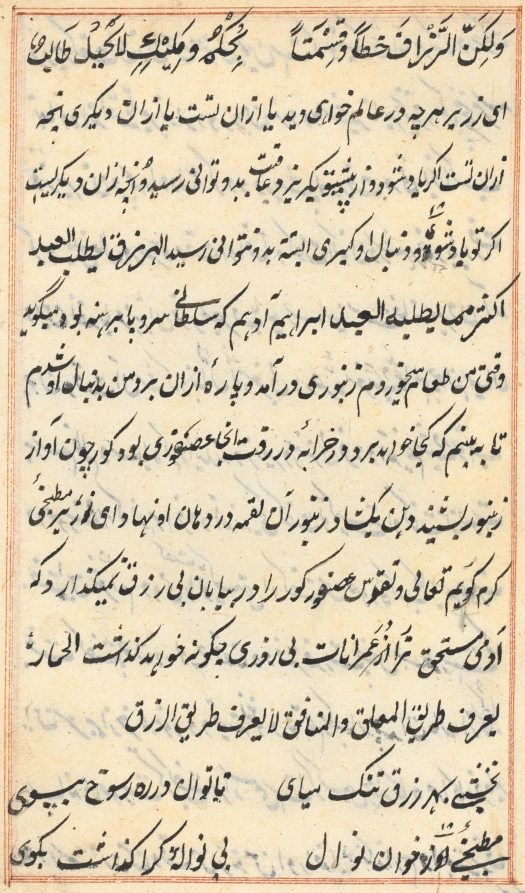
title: Page from Tales of a Parrot (Tuti-nama): text page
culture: Mughal India, court of Akbar (reigned 1556–1605)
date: c. 1560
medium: gum tempera, ink, and gold on paper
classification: Painting